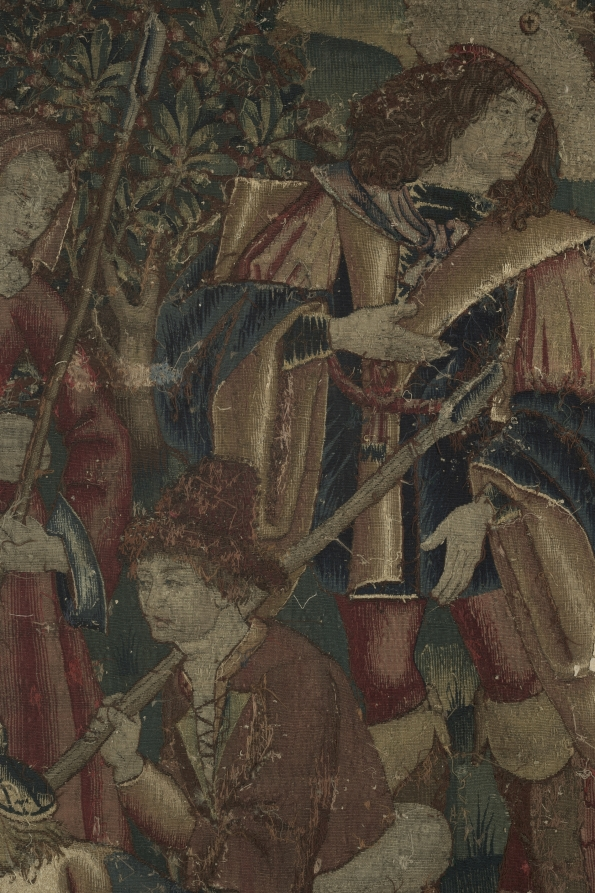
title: Shepherds in a Round Dance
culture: Netherlands, early 16th century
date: around 1500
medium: Wool and silk: tapestry weave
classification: Tapestry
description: Late medieval tapestries often use a limited yet contrasting color palette to portray stylized images. The expressions of these figures, for example, are conveyed more by their postures than by their faces. Four shepherds and shepherdesses join hands and dance to the music of a bagpiper at the far right, while a lord and two ladies on the left look on. A dog and sheep amid blossoming plants and trees contribute to the festive pastoral scene in front of a castle.